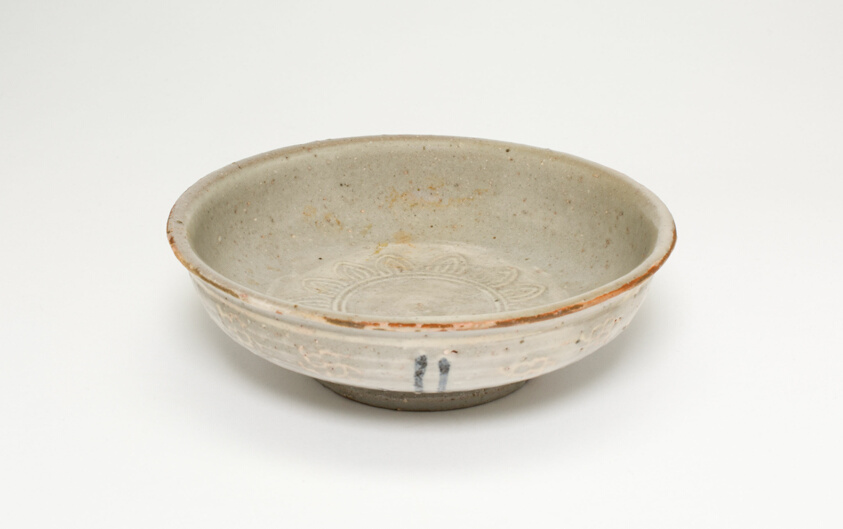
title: Low Bowl with Cranes and Floral Design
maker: Korea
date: 18th–19th century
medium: Celadon-glazed stoneware with underglaze molded decoration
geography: Korea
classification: ceramics